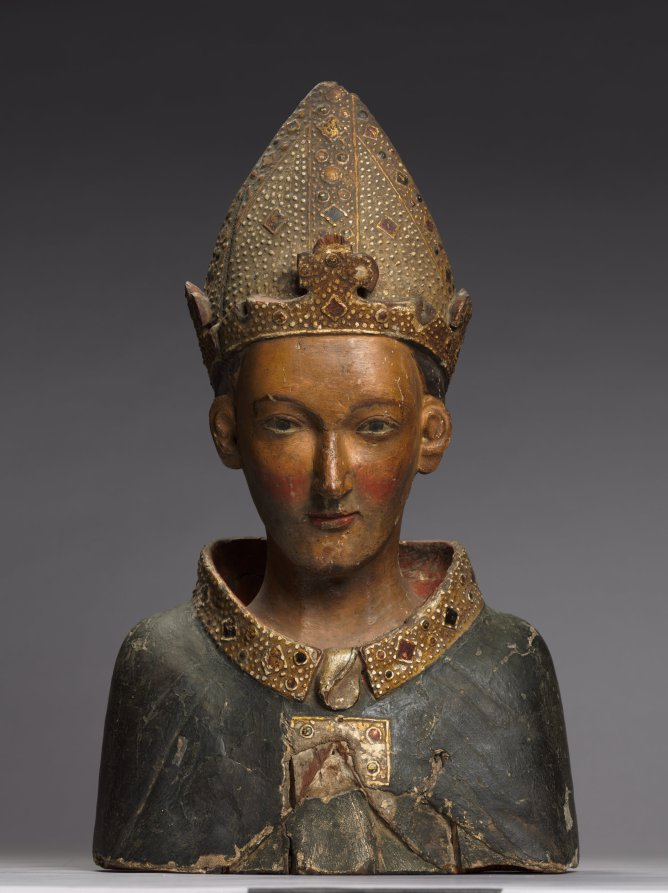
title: Bust Reliquary of St. Louis, Bishop of Toulouse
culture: Italy, Tuscany, Siena(?)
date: late 1300s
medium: wood (walnut) with polychromy, gesso and gilding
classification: Sculpture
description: This reliquary bust was probably made to house a relic of Saint Louis, Bishop of Toulouse (1274–97), second son of Charles II of Anjou, King of Naples (1288–1309). Renowned for his works of charity, he was made bishop in 1297 and died shortly after at the age of 23. He was canonized in 1317, and his cult of veneration spread rapidly in Italy and Spain. In art, Louis is generally represented as a "boy" bishop without a beard and with youthful features. The relic (now lost) would have been enshrined within. On feast days the reliquary would have likely been carried in procession and otherwise placed in a church sanctuary or on a side altar for the veneration of the faithful. Relics were the physical remains of the saints, chiefly their bodies. The living venerated the relics of the saints in order to seek their patronage, which in turn provided a proximate link to the divine ruler. The power of the saints was therefore manifested by and through their relics, or objects that were owned or touched by them. Medieval pilgrims, in a world fraught with peril, sought close physical contact with relics, which protected both the spiritual and temporal welfare of laypeople and religious communities.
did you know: This small bust was hewn out of wood, but painted realistically. Its life-like accuracy gave the medieval worshipper the sense that they were in the presence of the beloved bishop Saint Toulouse.